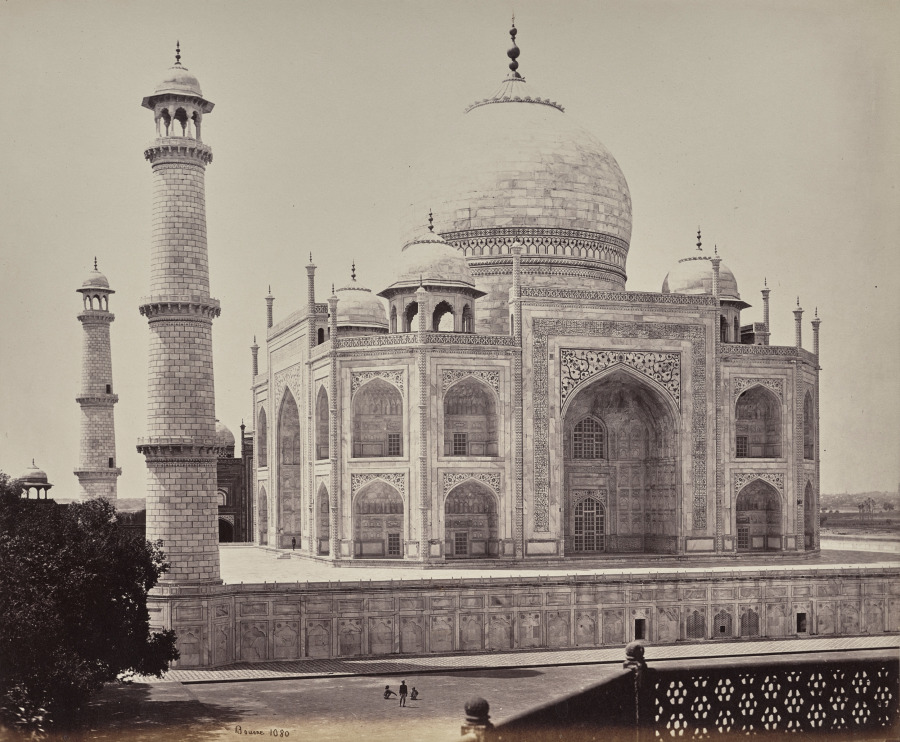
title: Agra. View of the Taj from a Corner in the Quadrangle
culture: England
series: Photographs of Northern India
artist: Samuel Bourne (British, 1834–1912)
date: 1863–70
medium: albumen print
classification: Photograph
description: The 50 images in this album, all taken in the 1860s, move from the hill towns of the Himalayas down to cities including Lahore (now in Pakistan), Delhi, Lucknow, Agra, Benares (now Varansi), and Calcutta (now Kolkata). Architectural studies of major monuments offer valuable historical records of what sites such as the Taj Mahal and the imperial mosque of the Mughal emperors in Delhi looked like before twentieth-century restorations.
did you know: Samuel Bourne, the author of most the images in this album, was a banker in England before he moved to India to become a professional photographer.